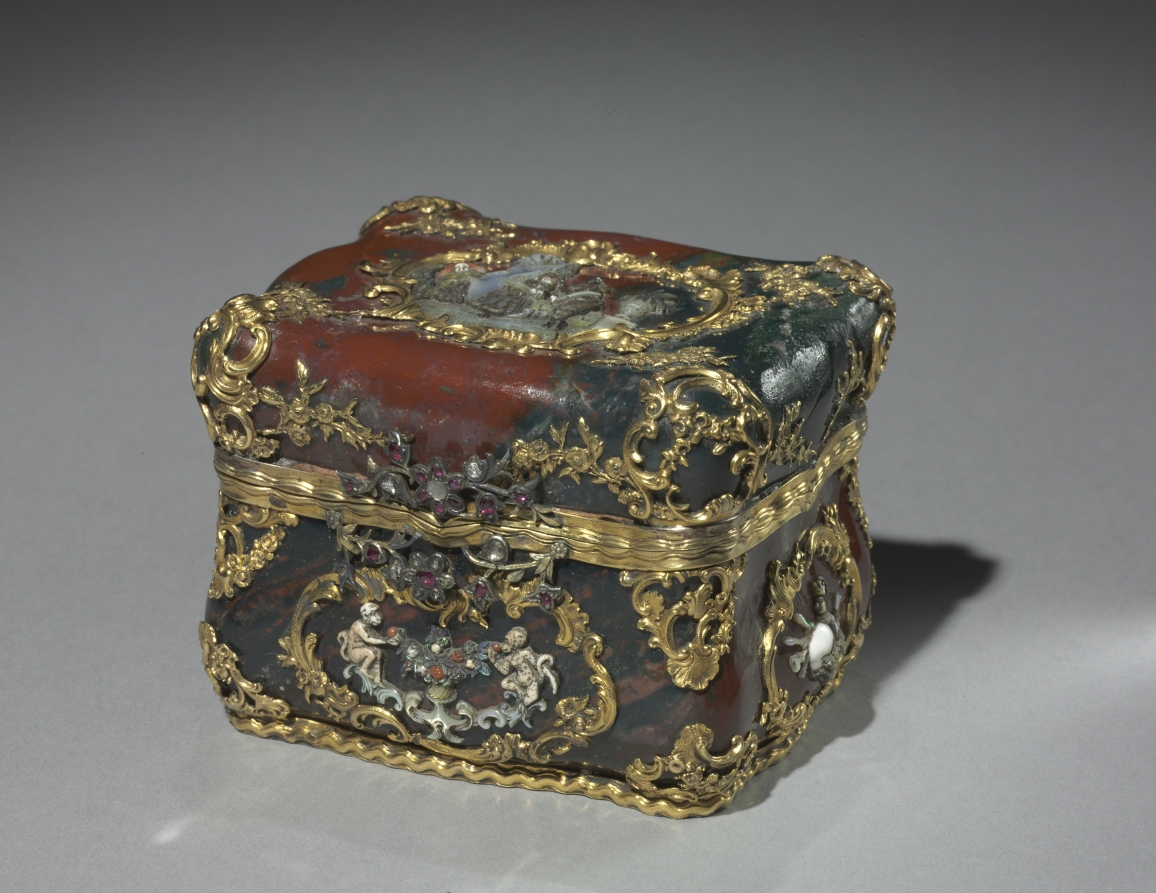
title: Inkstand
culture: Continental, 19th century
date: 1800s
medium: fused red and green glass (?) mounted with gold, pearl, jewels; interior lined with velvet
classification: Miscellaneous